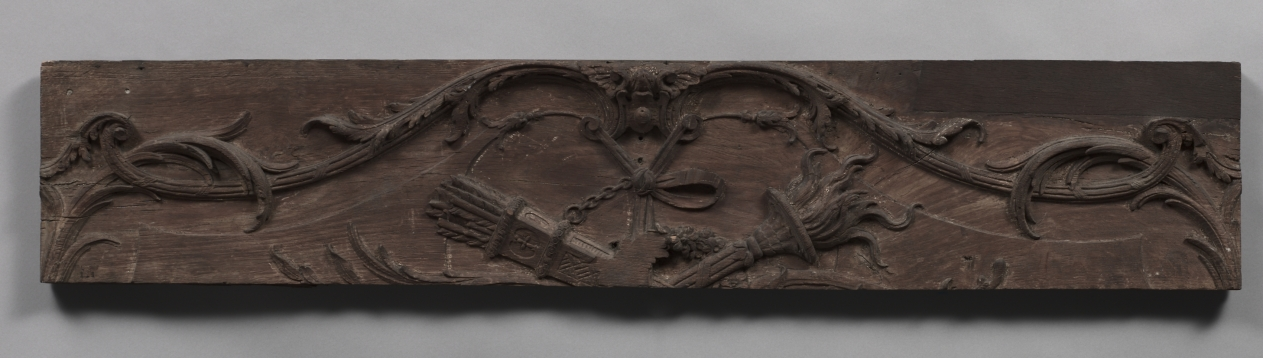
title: Panel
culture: France, Regency Period, 18th Century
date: 1715–1723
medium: wood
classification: Furniture and woodwork